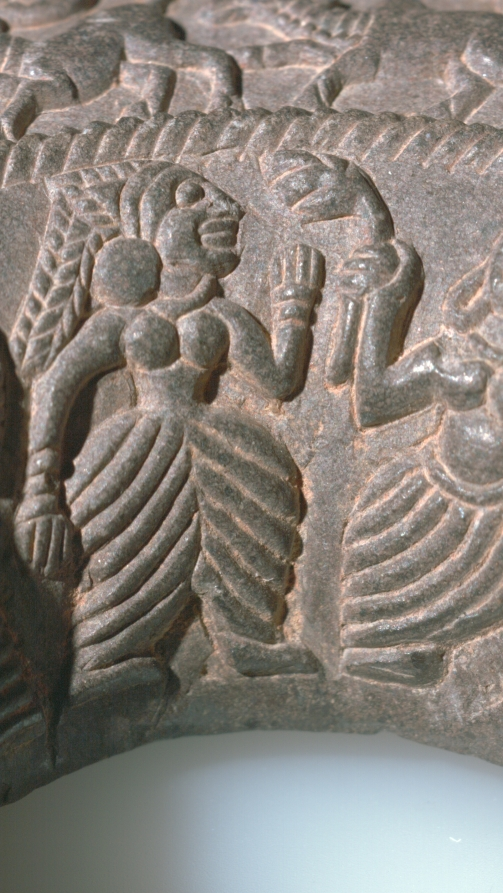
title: Ringstone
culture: India, Maurya period (322–185 BCE)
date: 200s BCE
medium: steatite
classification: Sculpture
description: Ringstones are among the earliest works of art to be created in stone during India's historical period. This example is finely carved with detailed images of affectionate couples and palm trees, running animals, and geometric motifs in concentric circles. The function of ringstones remains uncertain, since none of the surviving examples is inscribed or explained in a text.